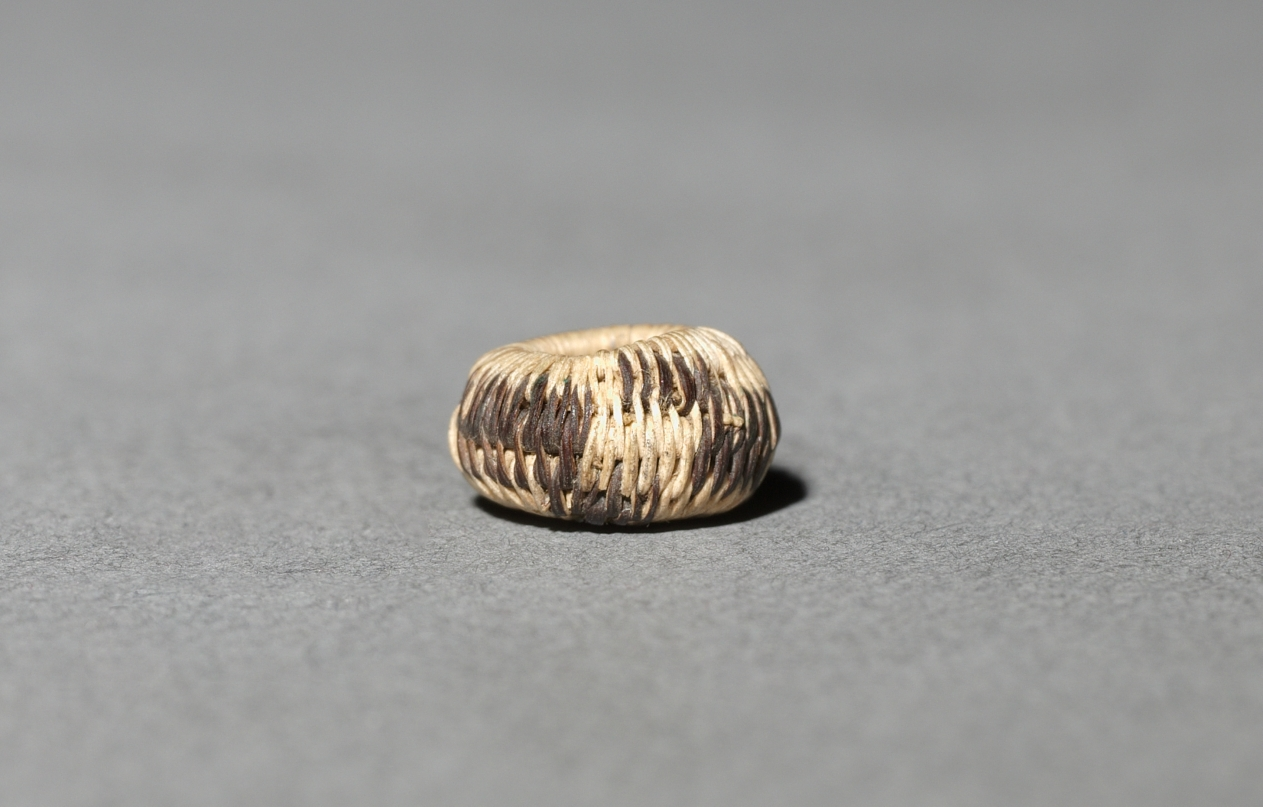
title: Miniature Round Basket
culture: California, Pomo, 20th century (?)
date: early 1900s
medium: coiled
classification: Basketry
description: Miniature baskets were made to demonstrate the basket maker’s virtuoso skill; these tiny marvels seem to be no exception—the smallest are just a few millimeters wide but still patterned. Such fine work required dexterity both in weaving and in harvesting and preparing the plant materials used to create the basket.